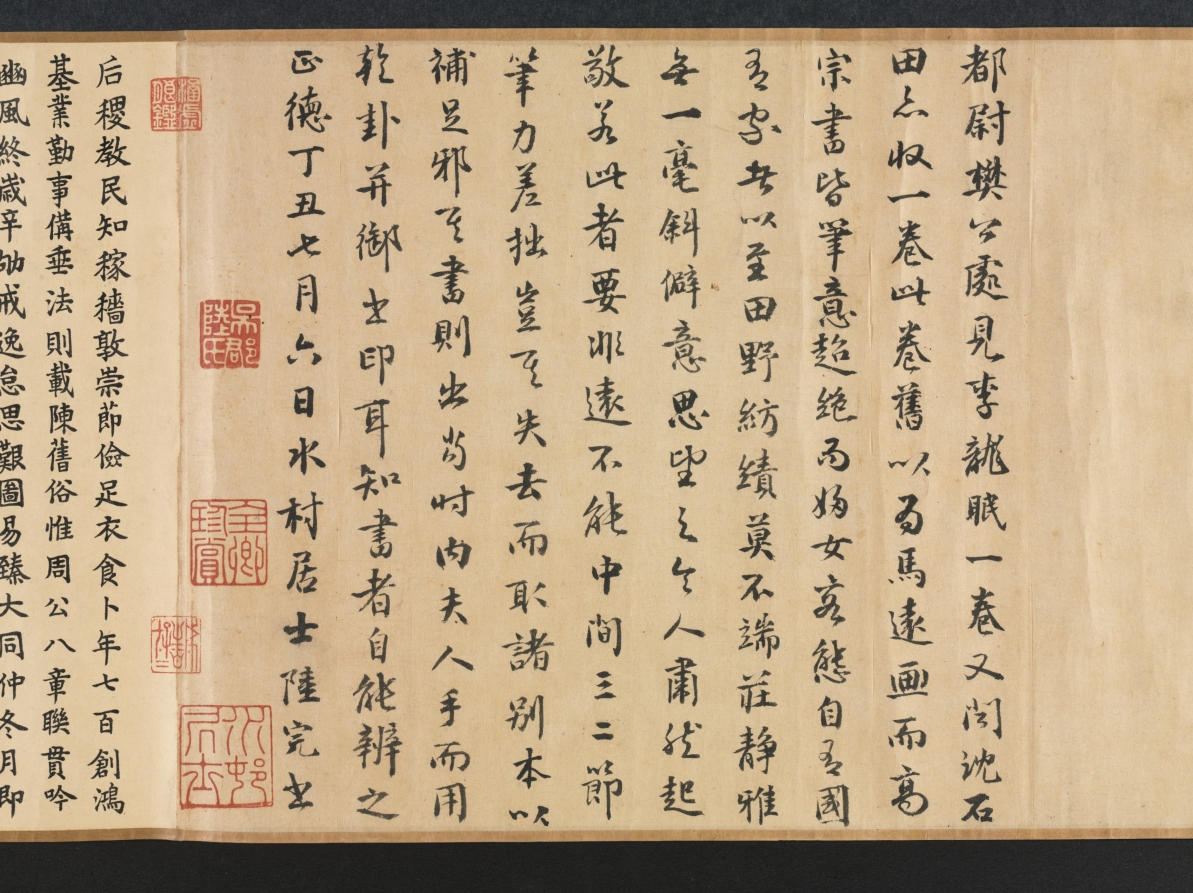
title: "Seventh Month" from the Odes of Bin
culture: China, Southern Song dynasty (1127-1279)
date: 1200s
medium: Handscroll; ink and color on silk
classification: Painting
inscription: Colophons: 1. [on the frontispiece] by the Qianlong emperor (dated 1741). 2. by Lu Wan (dated Zhengde dingchou, 1517). 2. by the Jiaqing emperor (dated 1807).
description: According to Confucian thought, the ruler looks after the well-being of his people which involves agricultural activities. Seventh Month from the ancient Odes of Bin in the Shijing (Book of Poetry) describes occupations throughout the year, including plowing, harvesting, hunting, making clothes, and observing rituals. The earliest illustrations of these Odes accompanied by text were commissioned by Southern Song emperor Gaozong (reigned 1127–1162). As the lower Yangzi delta had become the new seat of government, Gaozong had sets of these illustrations produced by court artists to revive the dynasty and convince the Confucian officialelite of his legitimacy to rule.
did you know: The Odes of Bin appears in the classic Shijing (Book of Poetry), an anthology of more than 300 poems, folk songs, and ceremonial hymns that were originally chanted to music.